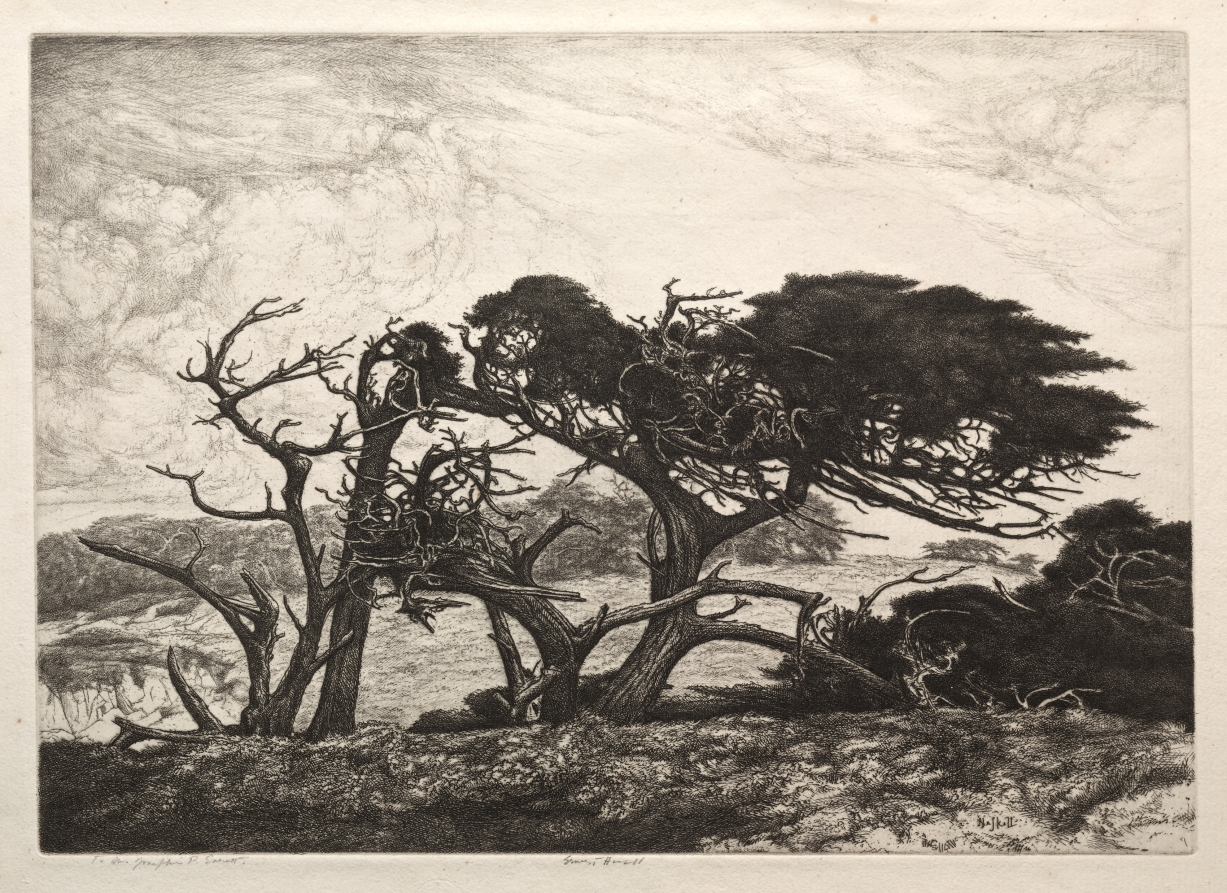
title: El Toro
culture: America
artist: Ernest Haskell (American, 1876–1925)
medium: etching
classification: Print